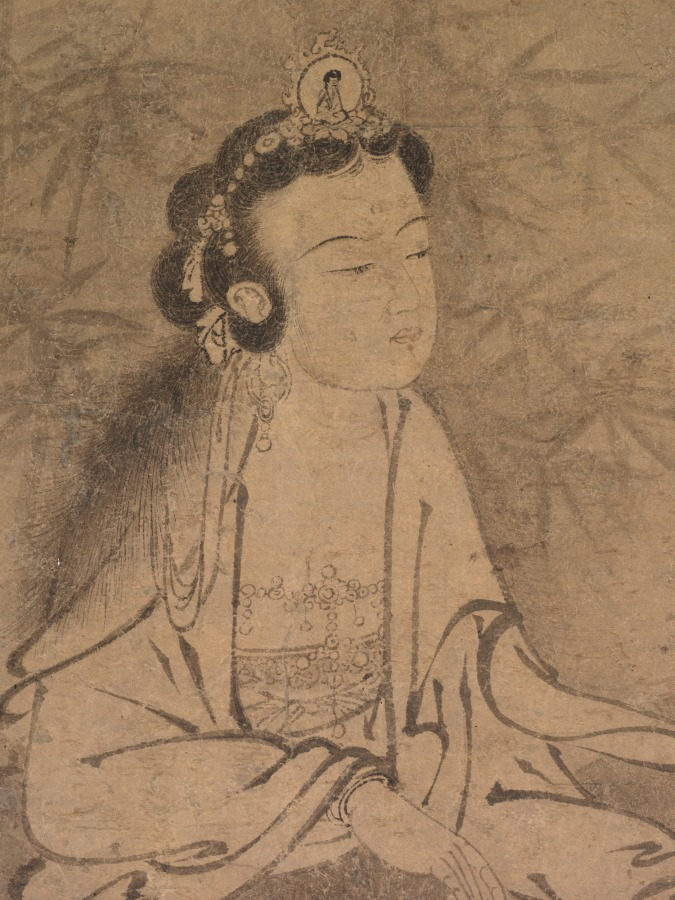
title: White-Robed Guanyin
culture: China, Southern Song dynasty (1127-1279)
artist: attributed to Zhang Yuehu (Chinese, active 1200s)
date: late 1200s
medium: Hanging scroll; ink on paper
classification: Painting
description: The figure here sits on a rocky elevation representing Potalaka in the Southern Sea, Avalokitesvara’s island home. A vase with a bamboo sprig holds pure water, the nectar of life. Bamboo shines through the figure’s halo, a way of seeing the illusionary world through the Buddhist truth. Avalokitesvara (Guanyin in Chinese), the bodhisattva of compassion, was integrated into the Chan Buddhist canon of venerated beings. In this context, the bodhisattva is often depicted in its female manifestation as the White-Robed Guanyin. The worship of the feminine White-Robed Guanyin has its origins on Mount Tianzhu in Hangzhou, where Qian Liu (852–932), ruler of the Wuyue kingdom, established the Upper Tianzhu Monastery to venerate her image.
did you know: As an artist, Zhang Yuehu was better known in Japan than in his own country.